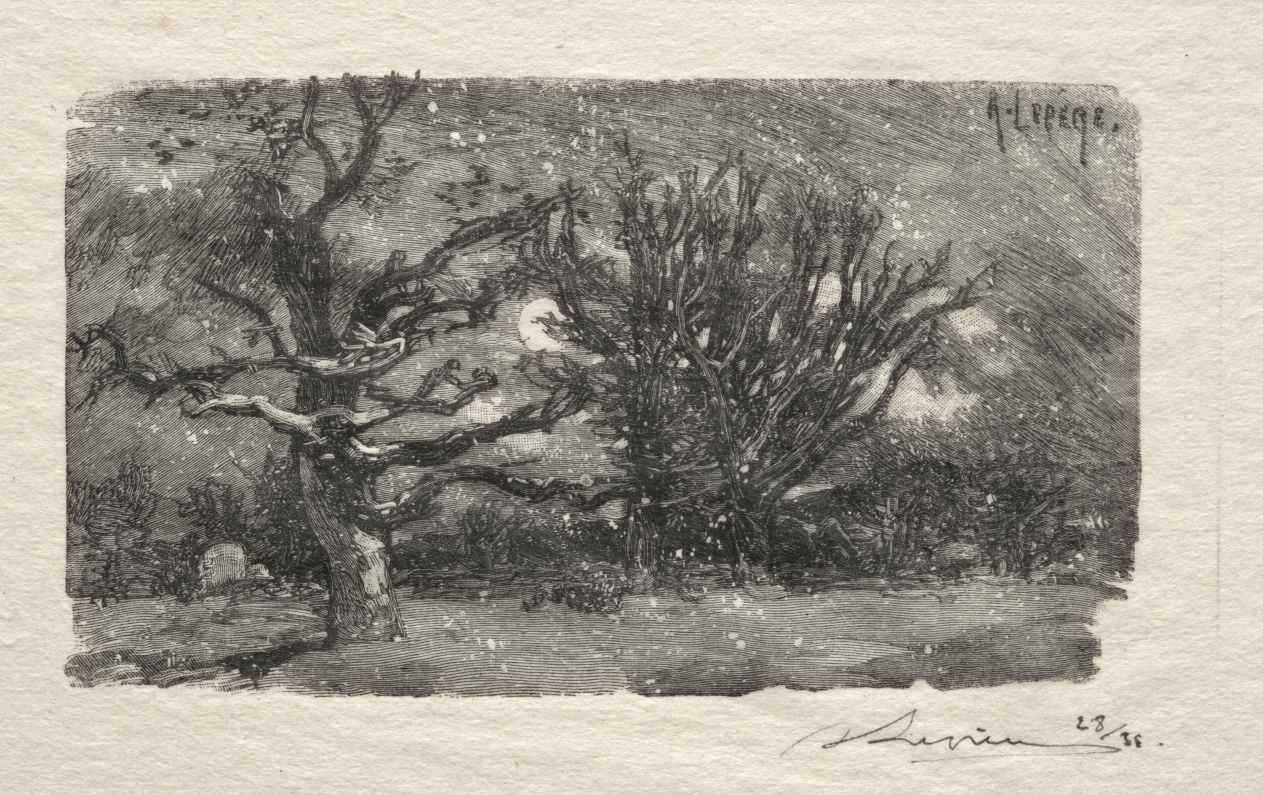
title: Au dormoir de Lantara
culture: France, 19th-20th century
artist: Auguste Louis Lepère (French, 1849–1918)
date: c. 1870–1918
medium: wood engraving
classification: Print